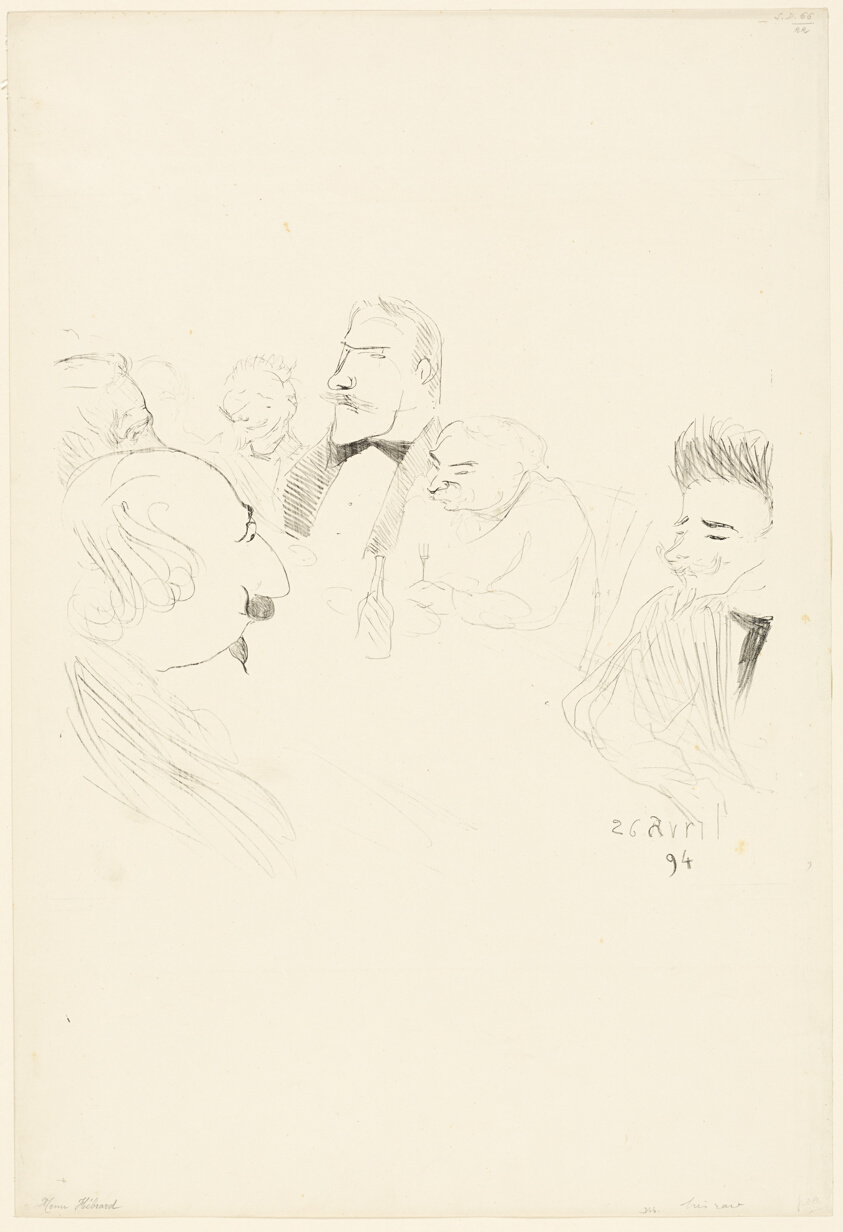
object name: Print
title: Menu Card for Adrien Hébrard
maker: Henri de Toulouse-Lautrec (French, 1864-1901)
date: 1894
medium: Lithograph on cream wove paper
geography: France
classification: lithograph; print; prints and drawing